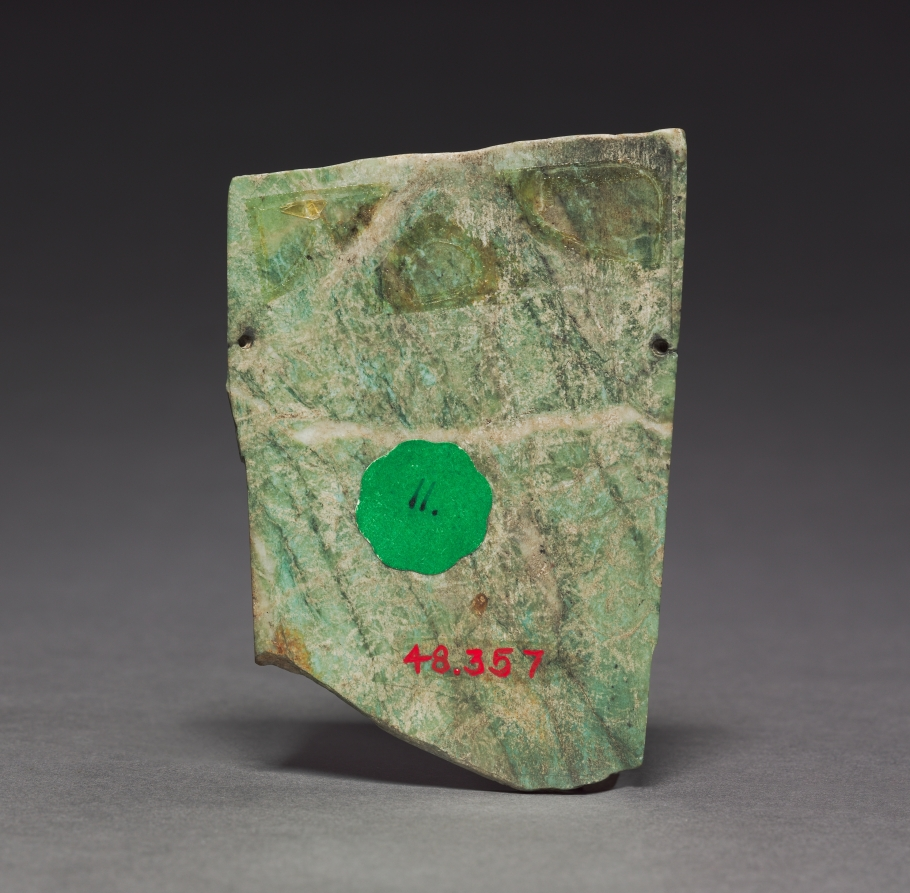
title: Pendant Plaque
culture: Central Mexico, Xochicalco Style, 8th-10th Century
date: c. 700–1000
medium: greenstone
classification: Stone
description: Xochipala jade carvings are typically composed almost entirely of curved lines. These were executed with hollow circular drills (perhaps made of bird bone or bamboo) of different diameters. The result is an animated figure that appears to be dancing.